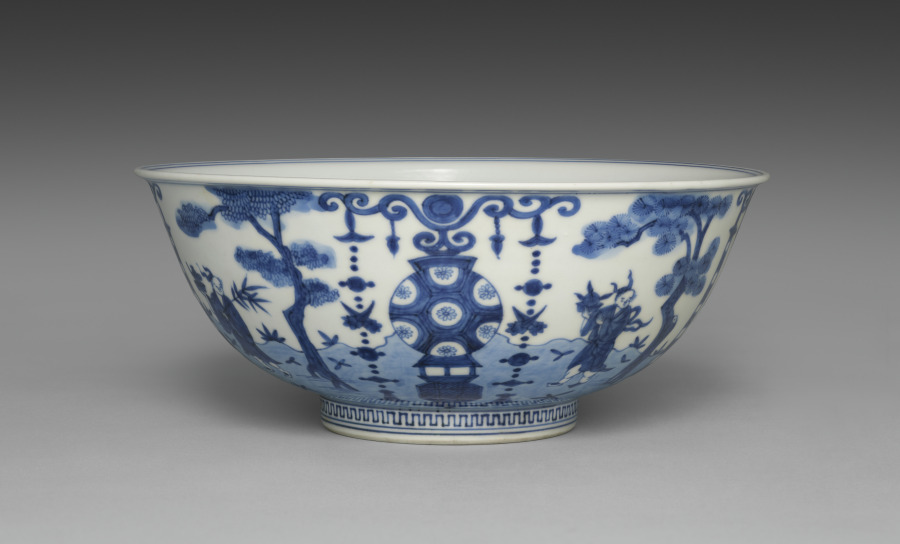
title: Bowl from Nesting Bowls with Daoist Immortals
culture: Japan, Meiji period (1868–1912)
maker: Seifū Yohei III (Japanese, 1851–1914)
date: 1893–1914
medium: Outer bowl from a set of three bowls; porcelain with underglaze blue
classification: Ceramic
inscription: 清風与平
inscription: 大日本清風造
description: Yohei III was capable of ink painting–like compositions in underglaze blue, as well as more decorative ones like that on this set of three nesting bowls. Bowls with very similar designs in five colors were produced in the reign of the Wanli emperor (r. 1572–1620) during the Ming dynasty, and Yohei must have had direct access to one of these or to a close copy. A scene of Daoist immortals is presented on the bowls. On each one, the ground plane is defined with a blue wash. Four lanterns are evenly spaced around the bowl. Two are flanked with linked-piece metalwork banners of the seven treasures. The alternate altars are adorned with textile banners. In between them are four immortals, each standing beneath a tree with small plants surrounding his feet. Two of the immortals hold fruit on a tray. Another carries an elixir-filled ewer and a willow branch. The fourth holds a swastika (manji), here an auspicious symbol, and a flower. Curiously, the inscription inside each footring reads “Made by Seifu of Great Japan,” in emulation of the dynasty and reign inscriptions that appear on Chinese ceramics; however, one can also see through the translucent glaze another inscription, “Seifu Yohei,” written in large characters within a double band of blue on the largest bowl.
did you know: In the bottom of each bowl is a scene of two robed immortals who appear to stand on a precipice in a mountainous landscape high in the clouds, with celestial orbs over their heads.